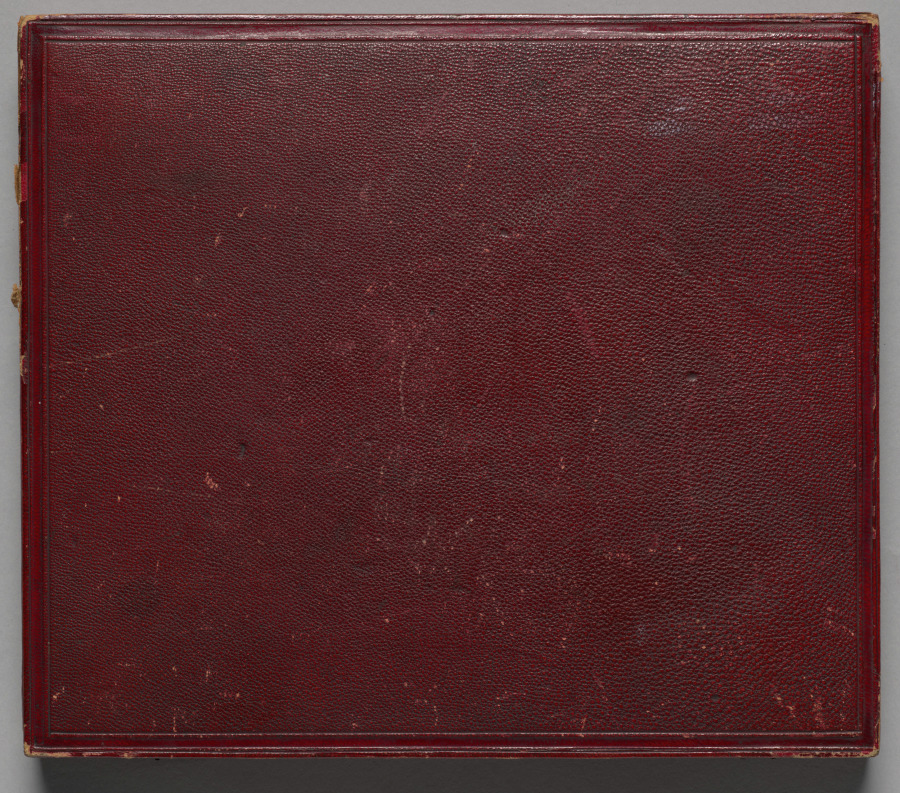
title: English family of seven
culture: England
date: c. 1840s-1850s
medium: daguerreotype, half-plate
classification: Photograph